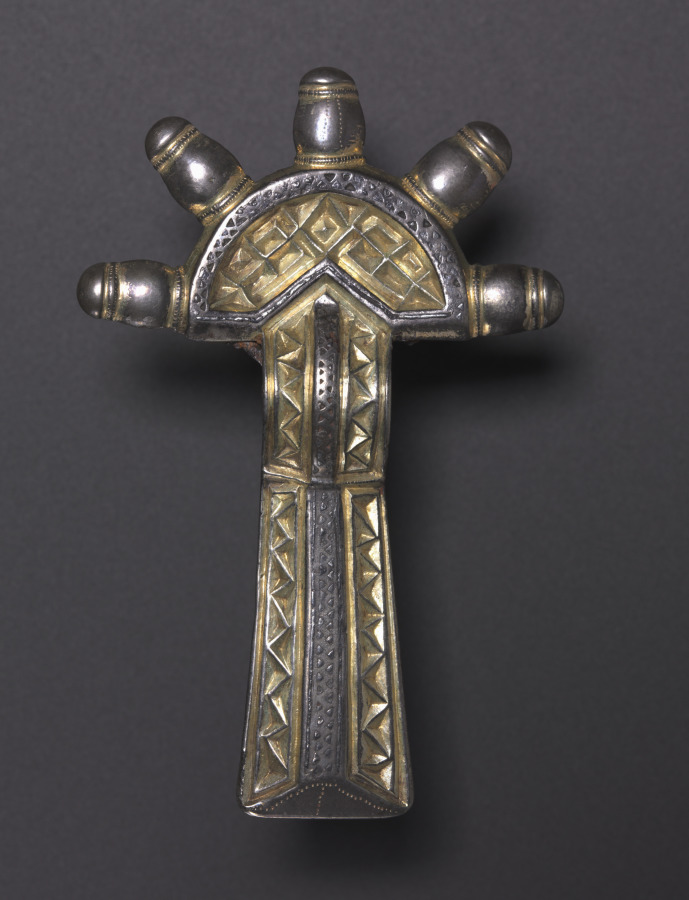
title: Bow Fibula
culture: Alemannic, 6th century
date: 500–550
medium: silver gilt and niello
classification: Jewelry